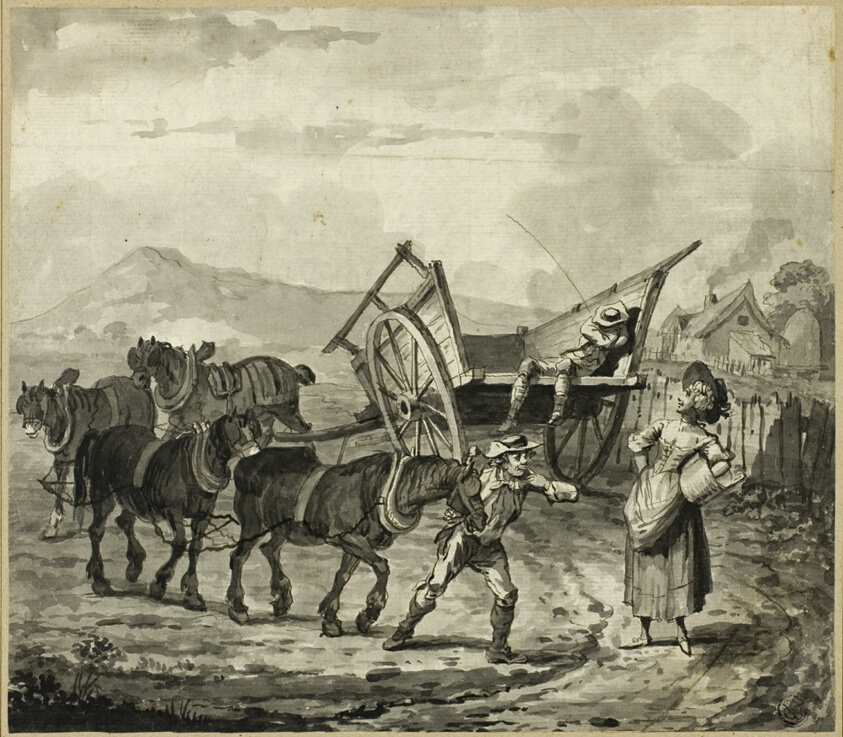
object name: Drawing and Watercolor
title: Giles Dolt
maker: Attributed to George Samuel; English, active 1785-1823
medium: Pen and brown ink and brush and gray wash, on gray laid paper, laid down on brown wove paper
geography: England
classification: ink or chalk wash; drawings (visual works); prints and drawing